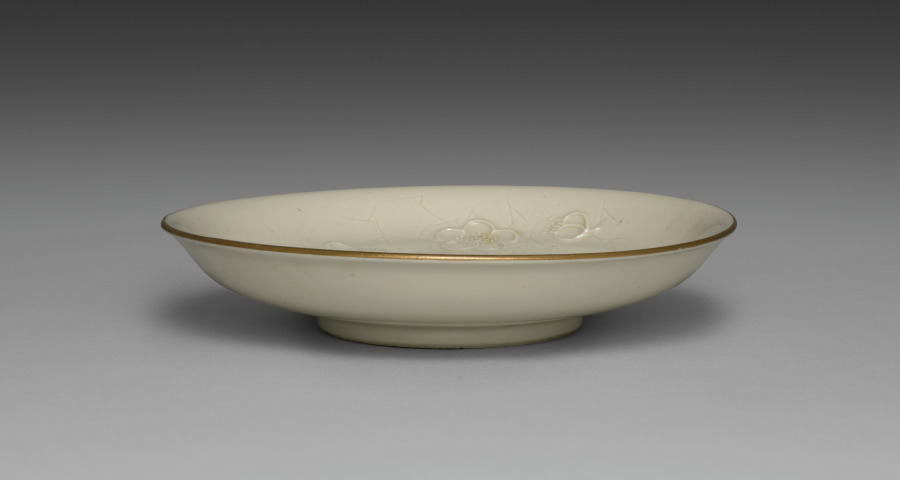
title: Medium-sized Dish from Dining Set with Plum Blossoms and Cracked-Ice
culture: Japan, Meiji period (1868–1912)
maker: Seifū Yohei II (Japanese, 1844–1878)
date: c. 1875–78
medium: Porcelain with molded designs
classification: Ceramic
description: Each item in this set has a delicate low-relief design of flowering plum branches over scattered, intersecting lines meant to resemble the cracked-ice surface of a frozen body of water and is signed on the base in gold pigment. While Yohei II produced many fine works in underglaze blue, like those produced by Kiyomizu Shichibei, he also made works in quite different styles later in his career, from the early 1870 s. In 1873, he was appointed purveyor to the Industrial Center of Kyoto Prefecture, a designation associated with Kyoto’s efforts to reach an international market through the port of Kobe; and from 1875 until his death, he was involved in national-level projects to present Japanese ceramics across the world. It was during this period that Yohei III was apprenticed to Yohei II, and it has been suggested that this set may in fact be an early example of Yohei III’s work, which he signed with his teacher’s name. Decorated with flowers resembling Japanese textile motifs, the set calls to mind the design of Yohei II’s pair of vases with plum blossoms in the Victoria and Albert Museum. Here, the elaborate trees created for a formal public exhibition setting have been translated into the approachable blossoms of the genteel domestic environment. While the designs are consistent across the pieces, each raised flower petal and pistil and each incised line in the ice was done by hand, so the cups, bowls, and dishes are similar yet unique. The bottoms of two boxes once identified the set’s owner, but the information has been deliberately obscured with black ink. However, inscriptions still visible appear to indicate two occasions, once at the end of July 1886 , and once again in June 1916 , when parts of the set were requested from Hokura in Niigata Prefecture. The location corresponds to a neighborhood in the present-day city of Jōetsu. The surname Tsuji 辻 also appears on a paper tag affixed to one of the box cloths. Future research may possibly reveal more about their provenance. A vase by Yohei III in a private collection combines the formal grandeur of the Yohei II vases in the Victoria and Albert Museum with the gentler design of this dining set, placing flowering plum trees against soft, scalloped-edge clouds resembling those in golden screens.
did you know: The dining wares have a creamy white coloration that the four boxes containing them identify as Korean in style.